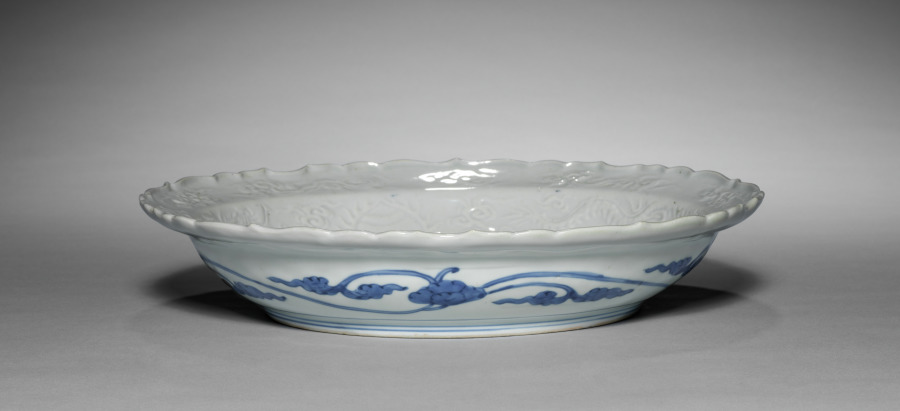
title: Large Dish with Landscape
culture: Japan, Edo period (1615–1868)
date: 1750s–80s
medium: porcelain with underglaze blue and molded decoration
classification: Ceramic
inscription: Seal on base illegible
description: The motif in the central medallion of this large dish depicts a knotted pine tree on the right with branches of pine needles forming triangular shapes resembling mountains in a distant landscape. Above and below the branches are three cloud bands in alternating light and dark washes of cobalt blue. In the foreground, a small blooming orchid reaches toward the left of the dish, balancing the gentle sway of the pine tree.